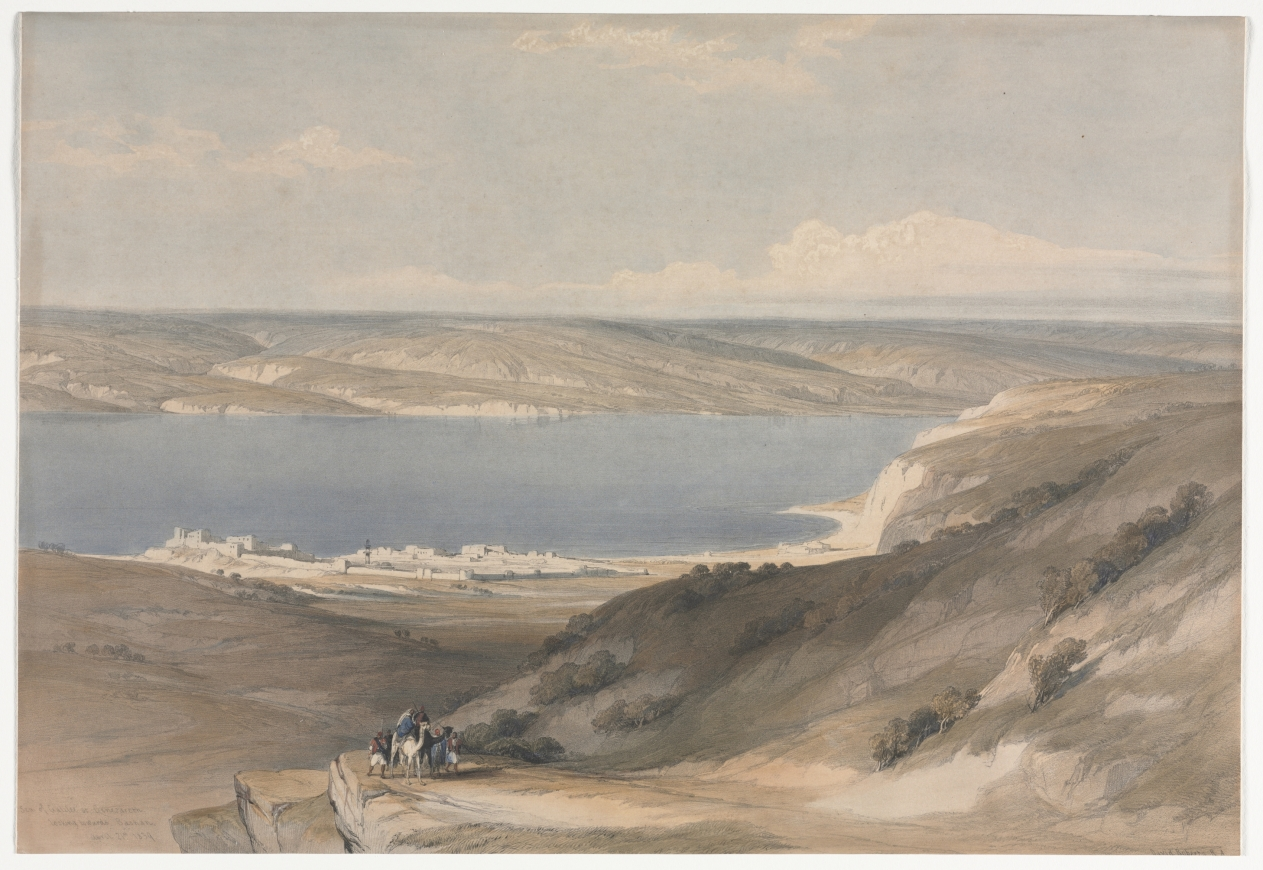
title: Sea of Galilee at Genezareth looking Towards Bashan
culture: England, 19th century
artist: David Roberts (Scottish, 1796–1864)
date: 1839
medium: color lithograph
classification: Print